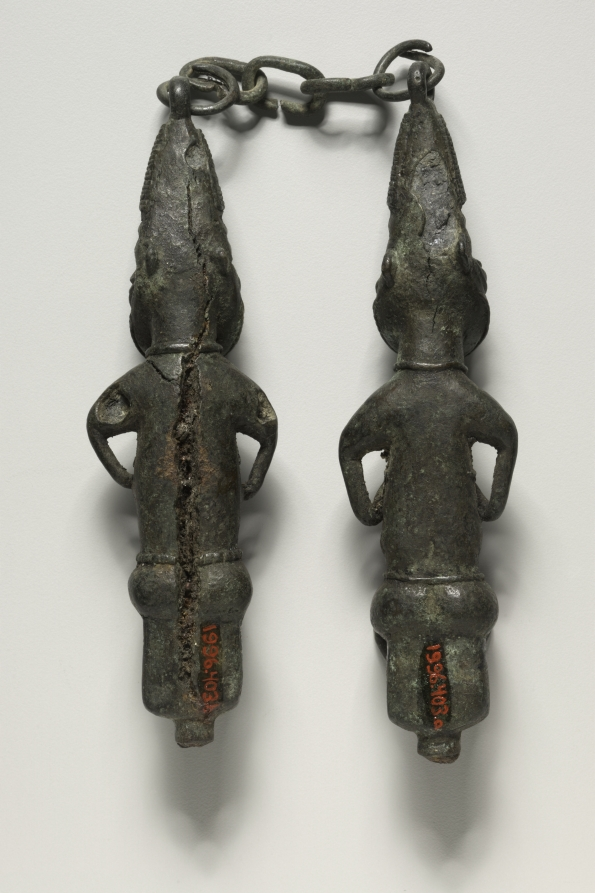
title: Pair of Ritual Staffs (ẹdan Ògbóni)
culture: Africa, West Africa, Nigeria, Yorùbá-style maker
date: possibly 1800s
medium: Copper alloy and iron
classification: Sculpture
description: The chain connecting these two figures allows them to be worn in public by a member of the Ògbóni or Òṣùgbó association as authority emblems. The male on the right gives the association’s typical salute by clasping his left fist on the right one, while the female on the left holds her breasts as a sign of welcome and generosity. The use of copper alloy and iron expresses Ògbóni/Òṣùgbó's concerns with longevity and durability.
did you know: Imagine how this would look when its owner wore it; the chain would go around the back of the neck and the figures would rest on their chest.